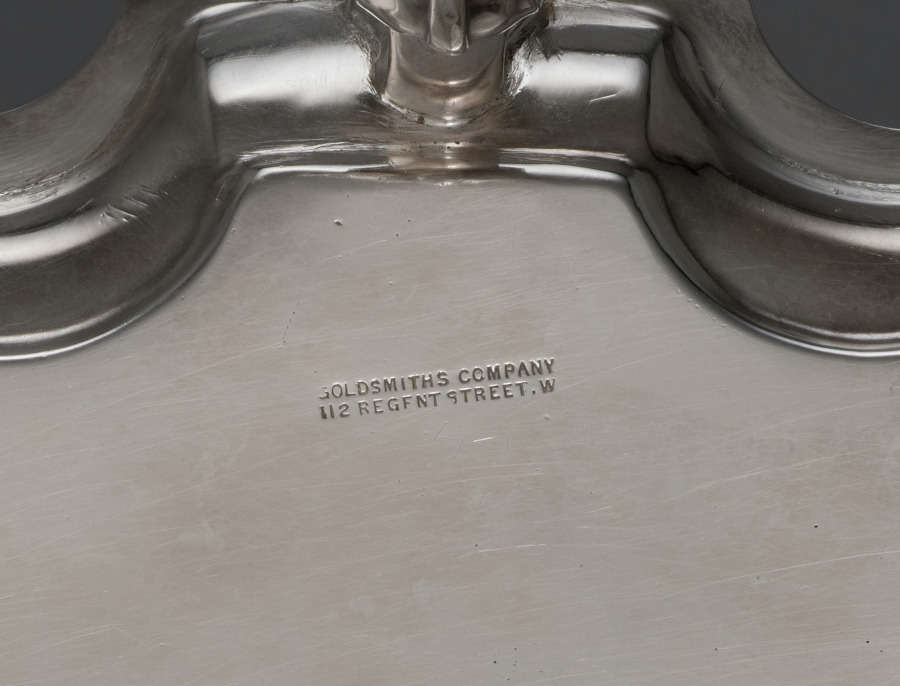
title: Salver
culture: England, London, 20th century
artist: Goldsmiths & Silversmiths Co. (British)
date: c. 1910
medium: silver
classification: Silver